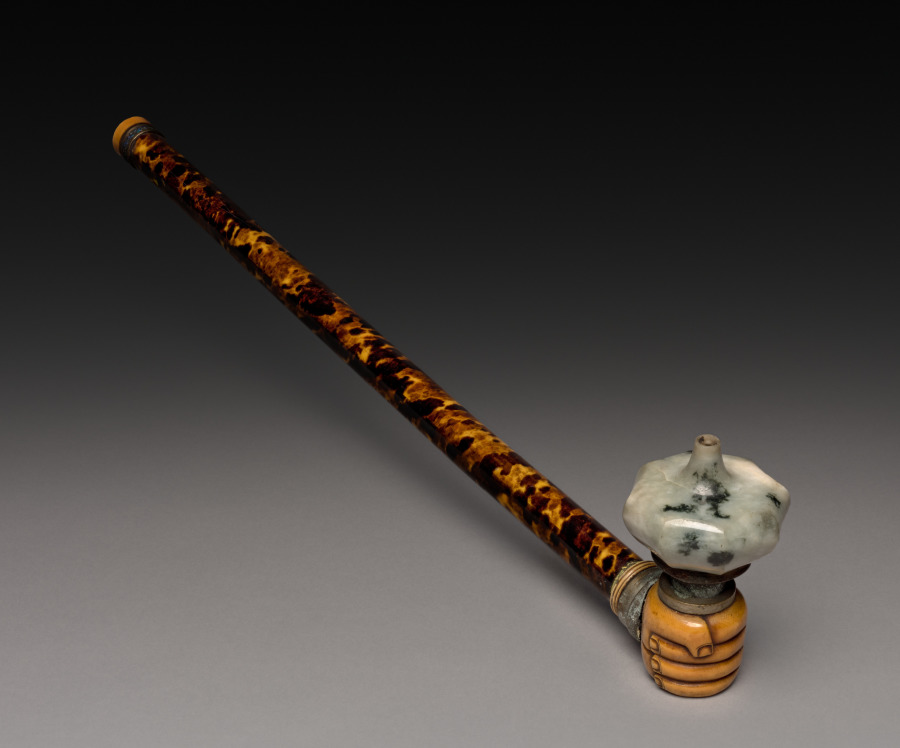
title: Opium Pipe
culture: China, Qing dynasty (1644-1911)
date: 1800s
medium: imitation tortoise-shell, ivory and jade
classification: Miscellaneous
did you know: The imitation tortoise-shell pipe has an ivory tip terminating in a clasped hand of ivory holding the jade bowl.